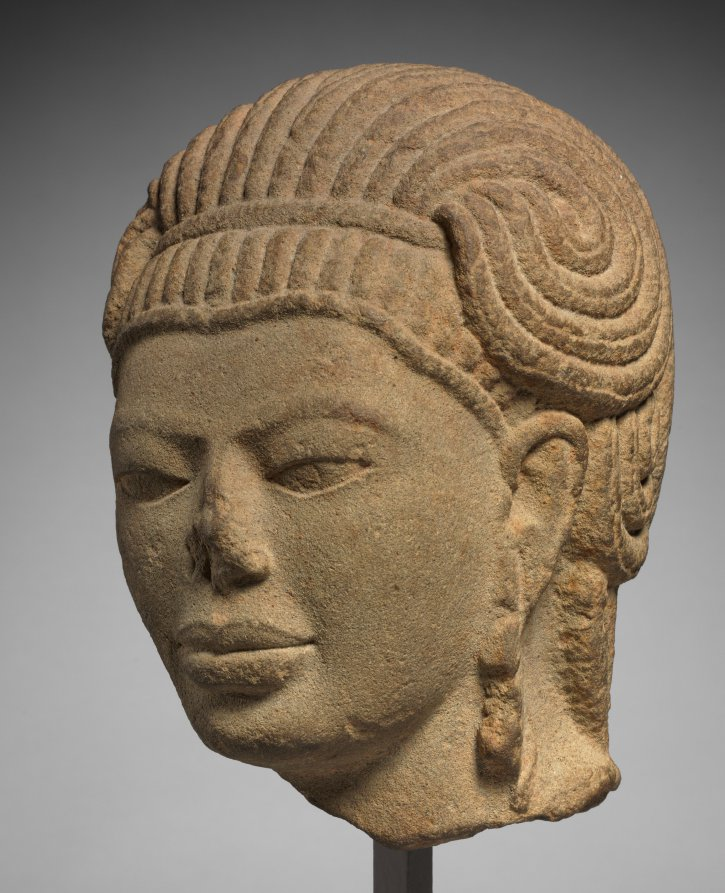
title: Head of Male Deity, possibly Aiyanar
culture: Central Thailand, Phetchabun province, possibly Si Thep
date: 600–650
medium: sandstone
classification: Sculpture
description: The dreadlocks suggest that this figure is related to the Hindu god Shiva, and the sensitive rendering of the facial features indicates that it was carved during the early phase of stone sculpture production in Thailand. A more complete sculpture of another male figure with dreadlocks and youthful features is known from Thailand and shows him seated with one knee up, supported by a yoga strap. In South India, a deity of this description is worshiped as a guardian on the outskirts of villages on the banks of ponds and reservoirs, known as Aiyanar, which means "Lord" in the Tamil language. Alternatively, this figure could be an ascetic, or follower of Shiva.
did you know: This figure may depict a deity who protects travelers on their way.